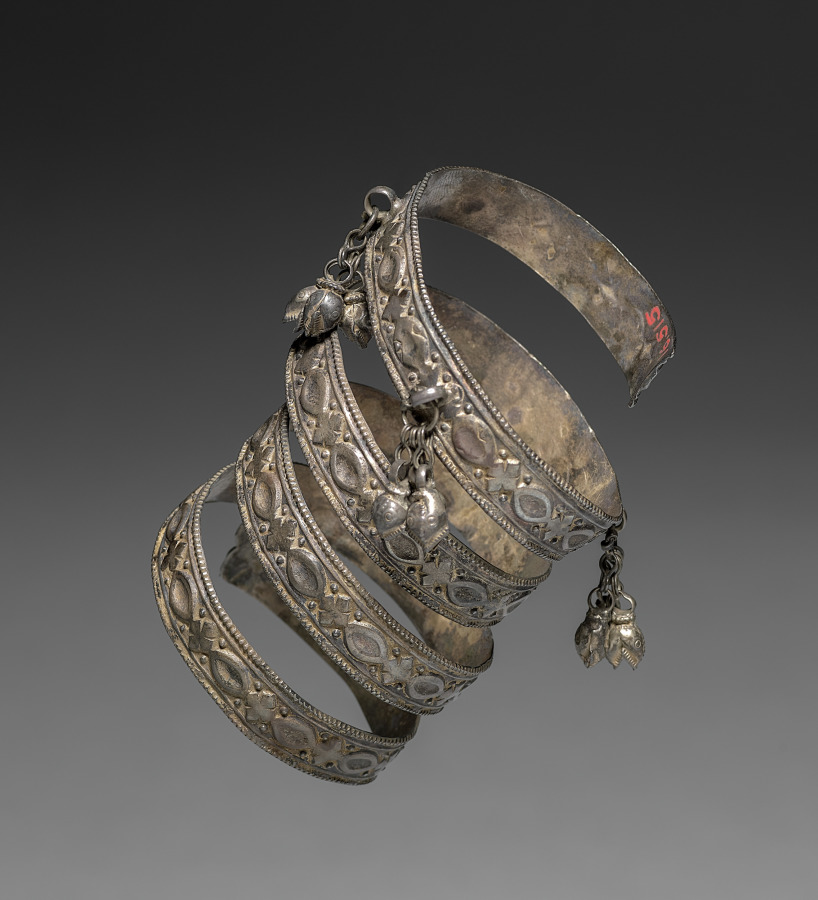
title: Spiral Armlet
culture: India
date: 1800s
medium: silver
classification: Jewelry